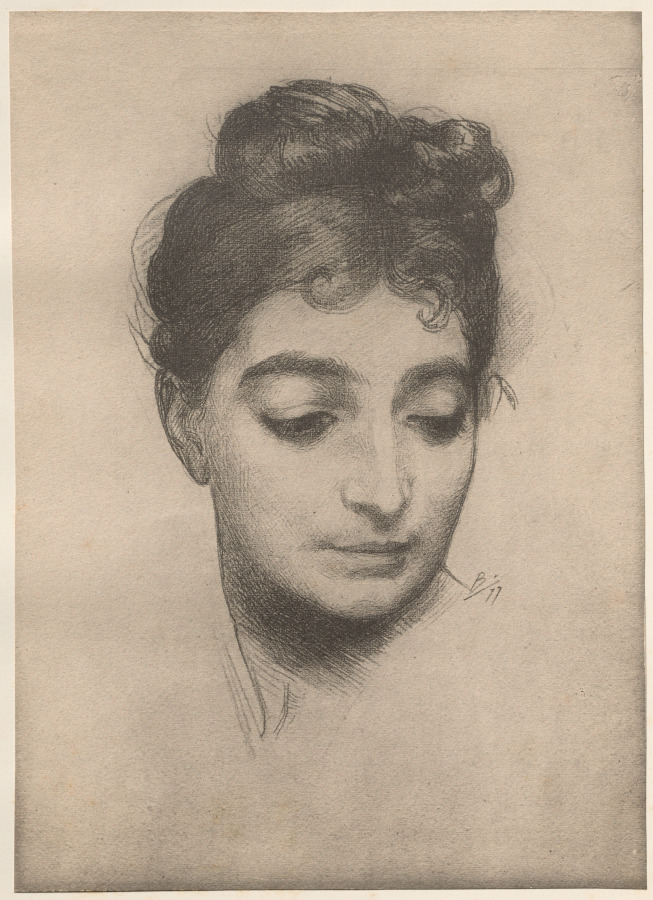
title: Portrait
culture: France, 19th century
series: L'Estampe Moderne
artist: Félix Bracquemond (French, 1833–1914)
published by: Imprimerie Champenois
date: 1899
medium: lithograph from bound volume containing 50 lithographs, each with a tissue paper guard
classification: Bound Volume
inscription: In plate: right of figure's neck: B'/77; lower right corner of secondary support: blindstamp of l'Estampe Moderne (Lugt 2790)